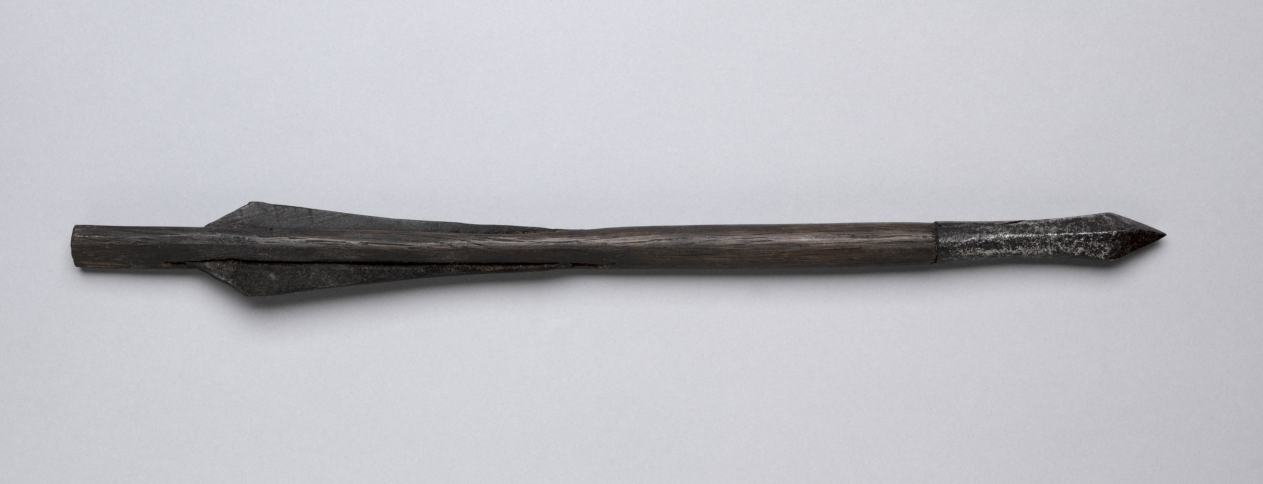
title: Crossbow Bolt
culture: Germany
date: 1500s–1600s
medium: wood, leather, steel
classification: Arms and Armor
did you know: Bolts with feathering made of leather were used mainly in the Tyrolean area, which includes northern Italy and western Austria.